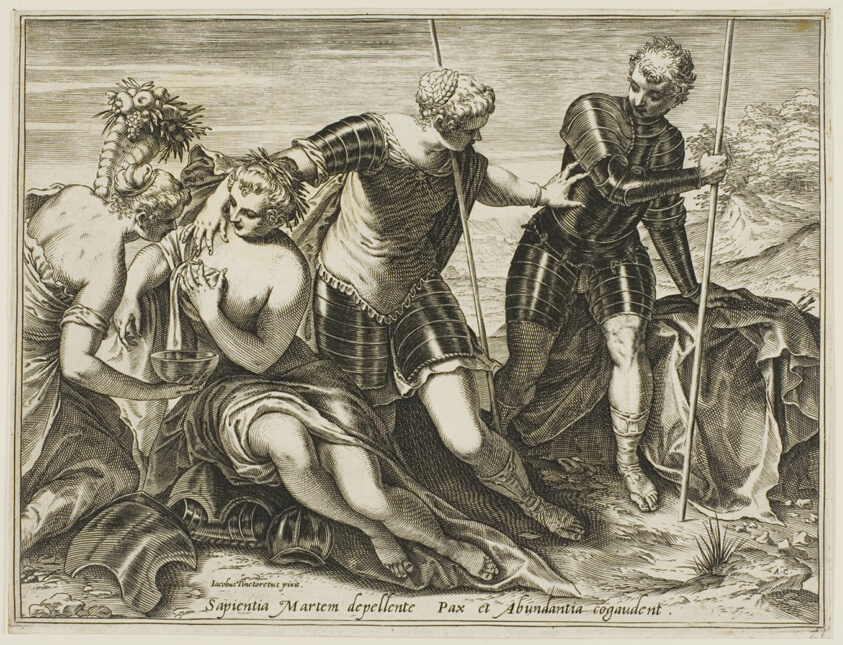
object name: Print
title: Mars Driven Away from Peace and Abundance by Minerva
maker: Agostino Carracci (Italian, 1557-1602); after Tintoretto (Jacopo Robusti; Italian, 1519-1594)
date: 1589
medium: Engraving in black on ivory laid paper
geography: Italy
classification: print; prints and drawing